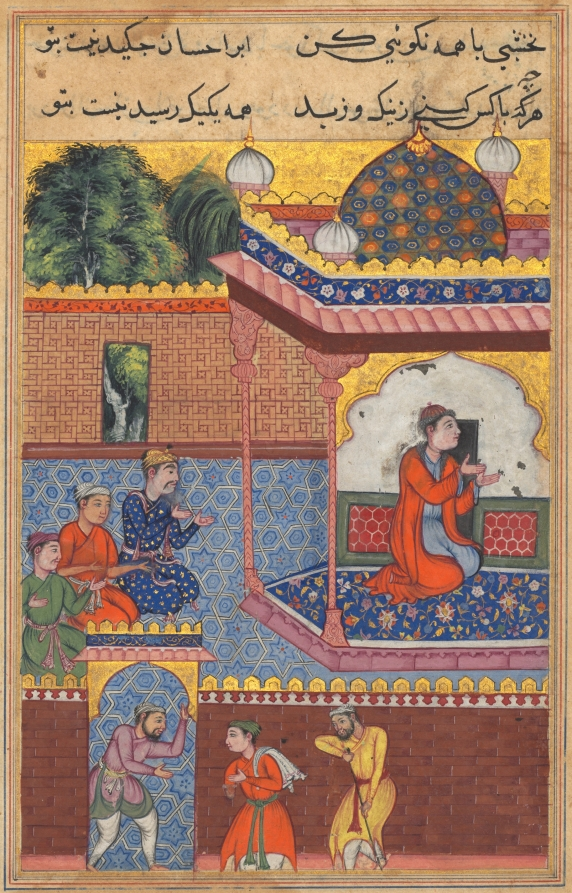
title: Kaiwan, Latif, and Sharif arrive at a house of worship, where they seek help from Khurshid who has become a mystical healer, from a Tuti-Nama (Tales of a Parrot): Thirty-second Night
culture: Mughal India, court of Akbar (reigned 1556–1605)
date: c. 1560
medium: gum tempera, ink, and gold on paper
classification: Painting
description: Khurshid, kneeling on the right in the blue dress and orange cloak, has shaved her head and donned the robes of a holy man. A group of supplicants sit behind her. Below, the three men who wronged her seek cures for their ailments: Kaiwan holding a staff, has gone blind, Sharif has lost a hand to leprosy, and Latif has developed a palsy.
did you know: The planet Saturn, called Kaiwan, is often depicted in South Asian imagery with a staff.